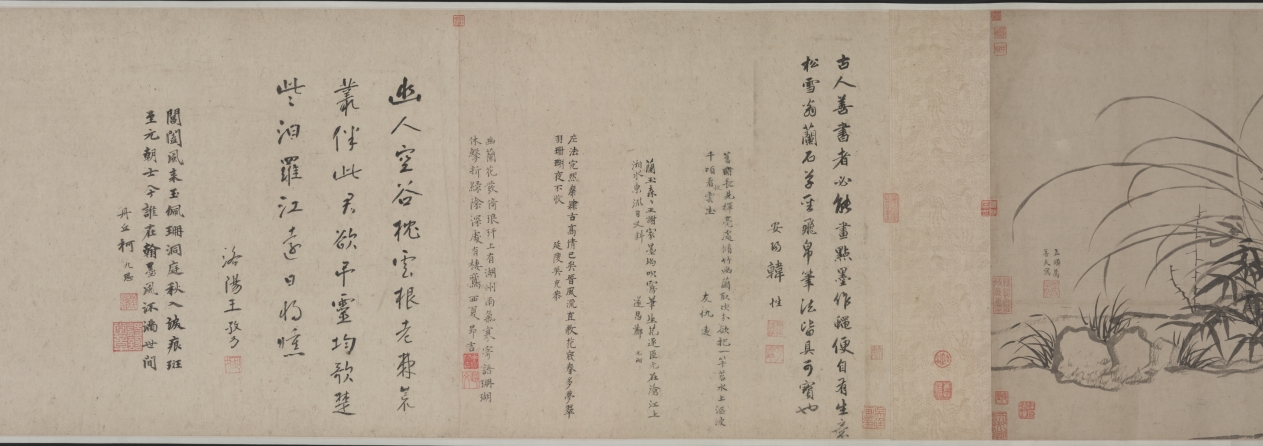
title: Bamboo, Rocks and Lonely Orchids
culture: China, Yuan dynasty (1271-1368)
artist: Zhao Mengfu (Chinese, 1254–1322)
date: 1271–1368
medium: Handscroll; ink on paper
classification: Painting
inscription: 竹石幽蘭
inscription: 孟頫為善夫寫. [印] 趙氏子昂; [印] 松雪齋; [印] 天水郡圖書印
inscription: 古人善書者必能畫點墨作蠅，便自有生意。松雪翁蘭石草聖飛帛筆法皆具，可寶也。安陽韓性 [印]明善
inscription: Colophon 2. Qiu Yuan 仇遠 (1247-after 1328), a respected poet during the Song and Yuan periods. He was linked to, among others, Zhao Mengfu and Gao Kegong. Zhao Mengfu painted a version of Nine Songs 九歌圖 for him, and Gao Kegong dedicated to him a painting titled Mountain Village 山村圖 (current whereabouts unknown). His poem here is also preserved in his collected works.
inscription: Colophon 3. Zheng Yuanyou 鄭元祐 (1292-1364), an erudite scholar and teacher of renown, active in Hangzhou and Suzhou. In the 1350s, when Gu Ying’s literary gatherings were at their peak, he was already elderly and participated in a limited way.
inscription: Colophon 4. Wu Kegong 吳克恭 (active mid-1300s), a friend of Gu Ying and Ni Zan 倪瓚 (1301–1374), a major Yuan painter.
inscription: Colophon 5. Angji 昻吉 (jinshi of 1348), of Western Xia 西夏 origin and a poet of distinction. He wrote an introduction to the painting Literary Gathering at Yushan 玉山雅集圖, of which Zhang Wo was the painter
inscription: Sheet 2. Yuan: friends of Gu Ying Colophon 6. Wang Zifang 王孜方 (active mid-1300s), an official who, at the time of his visits to Gu Ying’s estate, had reached the rank of Minister. He is better known under the name Wang Keju 王可矩.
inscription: Colophon 7. Ke Jiusi 柯九思 (1290–1343), a major official who served in the Kuizhang Pavilion 奎章閣 and as an advisor to Emperor Wenzong in matters of calligraphy and painting.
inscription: Colophon 8. Yu Li 于立 (active mid-1300s), a Daoist recluse, poet, and close friend of Gu Ying, so much so that during his visit to Gu Ying’s estate he was given accommodation in a special pavilion. His poem here is also preserved in Gu Ying’s Cao tang ya ji.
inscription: 至正十一年十月廿八日男奕百拜堇觀 [印] 趙奕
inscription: Colophon 10. Yu Ji 虞集 (1272-1398), a major official and literary figure who also served in the Kuizhang Ge. His poem is recorded in his collected works. The poem is one of a set of four inscribed at the request of Wang Huayu 汪華玉 on Orchids and Rock 蘭石圖 by Zhao Mengfu, obviously a different, long lost, painting. Wang Huayu was an official and a collector (jinshi of 1327). Yu Ji’s colophon here was written before 1348 and during his retirement in Linchuan 臨川, Jiangxi, possibly sent from there. It is possible he had not seen the painting, and his calligraphy here appears to be rather casual and detached, jotting down an old poem without much care, contrary to his earlier practice.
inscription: Colophon 11. Sun Shi 孫時 (mid-1300s–early 1400s), a native of Yuncheng 鄆城, Shandong, and a jinshi of 1390. He may have been quite young when paying a visit to the Yushan gatherings in the late 1340s and early 1350s.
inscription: Colophon 12. Zhang Zhu 張翥 (1287–1368), Qiu Yuan’s disciple and a poet of renown, who enjoyed a belated career in officialdom and was known for his integrity.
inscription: Sheet 4. Yuan and Ming: further friends of Gu Ying; colophon 17 begins the early Ming sequence. Colophon 13. Zhang Wo 張渥 (active c. 1336-after 1364), a frustrated scholar, a poet, and a painter of landscape and figures. An active participant in Gu Ying’s literary circle, he painted the Literary Gathering at Yushan, a pictorial document of the individuals and activities on Gu Ying’s estate. His rendering of Nine Songs is well known, and one version is in the collection of the Cleveland Museum of Art (see 1959.138). His poem here is also found in Gu Ying’s Cao tang ya ji, under the entry “ti Zhao Hanlin mo lan 題趙翰林墨蘭” (inscribed on the Ink Orchid by Zhao the Hanlin academician). This is a rare instance of calligraphy as well as signature by the artist.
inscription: 觀吳興公竹石幽蘭圖使人鄙吝頓消。其筆勢從橫天真爛澷，一出於二王書法。冝仲瑛寳而玩之異於常品也。至正八年十月天台陳基書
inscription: Colophon 15. Zhang Shen 張紳 (active about 1340–after 1385), a respected calligrapher and participant in Gu Ying’s literary gathering. He resided in Kunshan, the same city where Gu Ying’s estate lies. In the third line of the poem, he mentioned Gu Ying’s hao, “Jinsu 金粟.” This was a name he assumed later in life, after the death of his mother in the year 1356. Thus this inscription must have been written after that date.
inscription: Colophon 16. Wang Sun 汪遜 (active mid-14th century), a little-known native of Kuaiji 會稽, who may have been one of the infrequent visitors to Gu Ying’s estate.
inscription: Colophon 17. Hu Guang 胡廣 (1370-1418) is the first Ming colophon writer on this scroll. He was an official of great power in the court and a trusted advisor of Emperor Chengzu; he served as the Grand Academician of the Hall of Literary Profundity 文淵閣大學士 and Grand Academician of the Left Secretariat of the Heir-Apparent 左春坊大學士.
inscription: Sheet 5. Early Ming Colophon 18. Wang Yinshi 王尹實 (active about 1403–about 1424), a native of Siming 四明, Zhejiang, and a minor official and calligrapher.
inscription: Colophon 19. Zhang Yuchu (signed here as “Wuwei 無 為”), the forty-third Heavenly Master of the Zhengyi sect of Daoism. A man of erudition, he was also a poet, painter, and calligrapher. A modified version of the poem here was published in his collected works titled Xian quan ji 峴泉集. A slight modification in the first line is the only change: “Wu xing miao yao nian bing xue zi 吳興玅年氷雪姿.”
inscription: Colophon 20. Yao Guangxiao 姚廣孝 (1335-1418), a Buddhist monk, scholar, and counselor to Chengzu in his successful attempt at usurpation of the throne. Yao Guangxiao was a controversial figure but wielded enormous power.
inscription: Sheet 6. Wang Ning alone Colophon 21. Wang Ning 王寧 (d. 1411) signed as “Qingzhen 清真” in this colophon. One of the three seals reveals his identity as the Yongchun Hou 永春侯 [Marquis of Lasting Spring] (appointed 1402), and the husband of Princess Huaiqing 懷慶公主 (1328-1398), the sixth daughter of the founder of the Ming dynasty, Zhu Yuanzhang. This colophon postdates 1402.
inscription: Sheet 7. Mid-Ming Colophon 22. Ou Yi’an 區易安 (active first half of 15th century), unknown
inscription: Colophon 23. Chen Lian 陳璉 (1370-1454), a native of Dongguan 東莞, Guangdong 廣東, and an official admired for his erudition and perspicacity. In view to the known calligraphic style of Chen Lian, this colophon appears to be a transcription and not written by him.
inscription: Colophon 24. Wei Ji 魏驥 (1374-1471) enjoyed longevity (he lived to the age of ninety-eight) and an extended length of service as an official. A jinshi of 1406, he eventually became the Minister of Personnel in Nanjing 南京吏部尚書. The colophon here is dated 1434, when he was invited to view the painting by the Court Musician Mo Zhizhong 莫至翀, its owner. Again, in view of its calligraphic style, this was not written by him, but is a transcription from the original.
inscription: Colophon 25: Zhang Yi 章鎰 (active 1462-1473), a Ningbo native and an official with a reputation for courage and integrity.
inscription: Sheet 8. Further mid-Ming Colophon 26. Yin Zhi 尹直 (1427-1511), a controversial figure in Ming politics in spite of his erudition and high position as the Minister of War 兵部尚書.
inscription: Colophon 27. Zou Yu 鄒虞 (active 1460-1520; jinshi of 1490), a native of Hangzhou. In 1510, he was appointed Administrative Vice Commissioner in Guangdong.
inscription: Sheet 9. Xu Shouhe 徐守和 alone Colophon 28. Xu Shouhe 徐守和 dated his entry in 1629. Since he wrote it in his own studio, The Lesser Qingbi Pavilion 小清閟, he was likely the owner of the scroll. Xu’s life is not well documented; he was a connoisseur of note during the last years of the Ming dynasty rule. He may have acquired the Cleveland scroll from Wu Ting, whose seals appear here.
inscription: Sheet 10. The mounter’s note. Xu Shudong 徐曙東 of Jiaxing 嘉興 made the remounting on the first day of sixth month, 1802.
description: Bamboo and orchids are motifs associated with the virtues of the scholar-official. Bamboo that bends but does not break stands for moral integrity, endurance, and loyalty. Wild, fragrant orchids that bloom in the shadow symbolize modesty and the aura of learnedness. Rocks are often considered to be miniature versions of mountains that form the universe. This monochrome ink painting is brushed on paper in a masterfully calligraphic manner. While the rocks are delineated in chalky, dry strokes showing the effect of flying white (feibai), the bamboo and orchids are drawn with a swift brush demonstrating the virtuosity of the artist.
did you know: One of the many inscriptions records that the handscroll was last remounted by Xu Shudong 徐曙東 of Jiaxing 嘉興 in 1802.